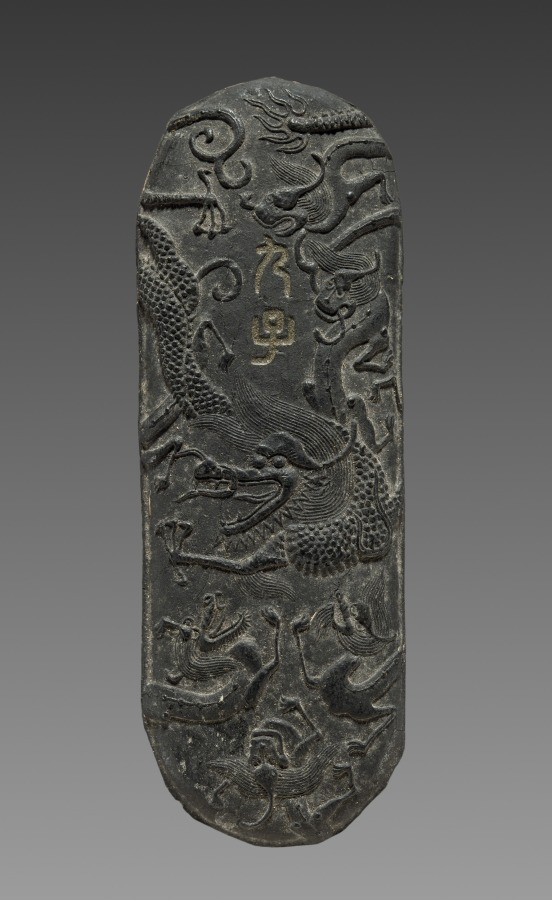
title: Ink Cake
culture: China, Ming dynasty (1368–1644)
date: 1368–1644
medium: ink cake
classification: Miscellaneous